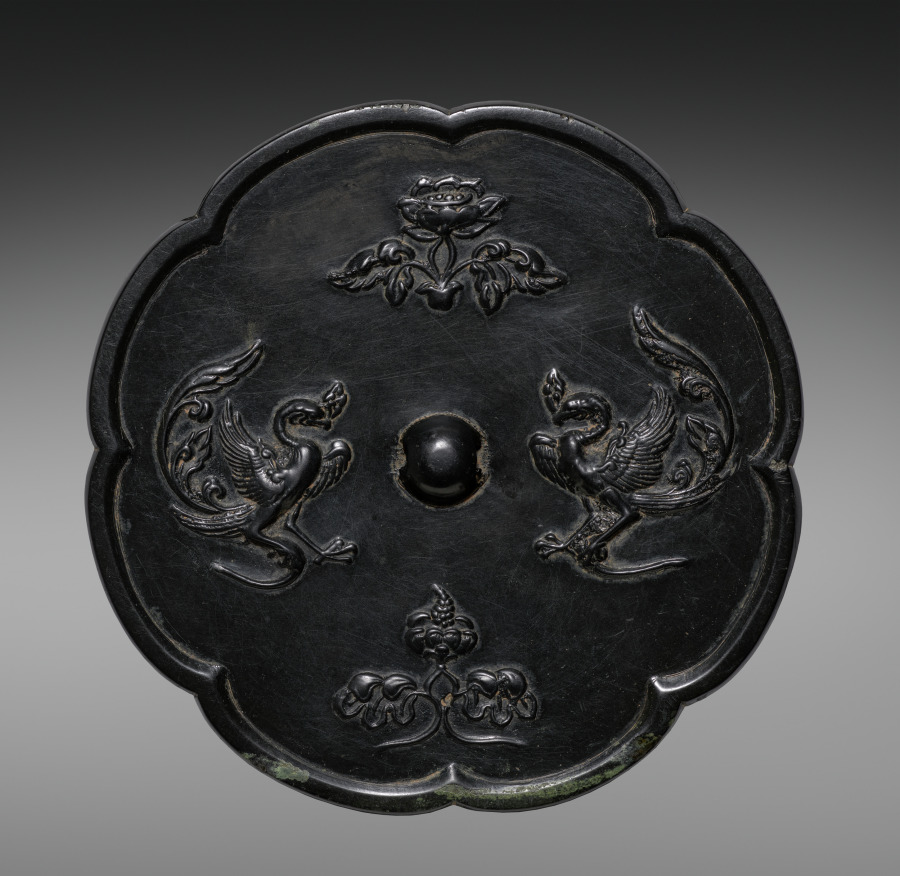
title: Lobed Mirror with Paired Phoenixes and Floral Displays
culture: China, Tang dynasty (618-907)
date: 700s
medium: bronze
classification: Metalwork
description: Lobed Mirror with Two Phoenixes and Floral Displays, 8th century ad China, Tang dynasty (ad 618-907) CMA 1995.348 [Cat. no. 66.a]